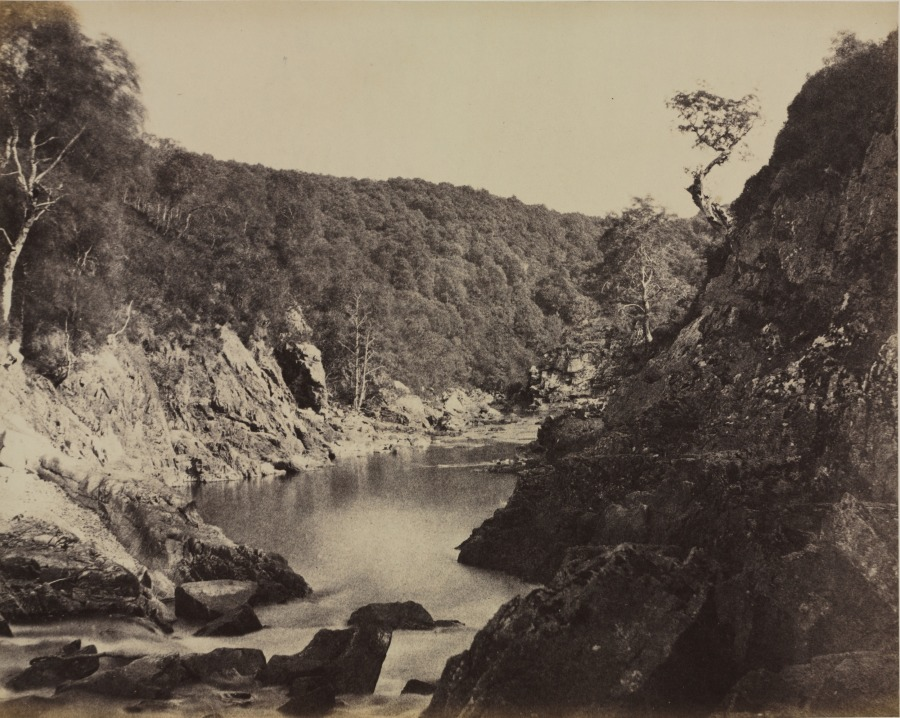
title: River Landscape, Scotland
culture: England, 19th century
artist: Captain Horatio Ross (British, 1801–1886)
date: c. 1858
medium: wax paper negative and albumen print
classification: Photograph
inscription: Written in pencil on recto of mount: "91"; [Erasures]; "CAT #41"; "A1006"; "95"